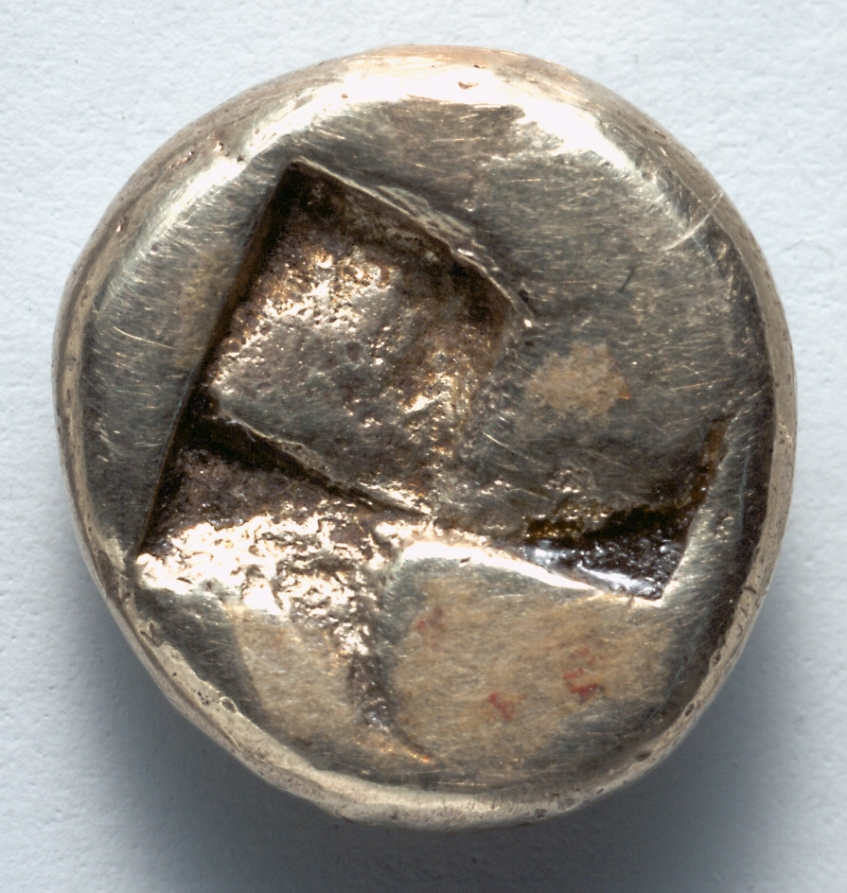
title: Hecte: Incuse Square (reverse)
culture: Greek, minted at Phokaia (Ionia)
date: 600–350 BCE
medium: electrum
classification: Coins